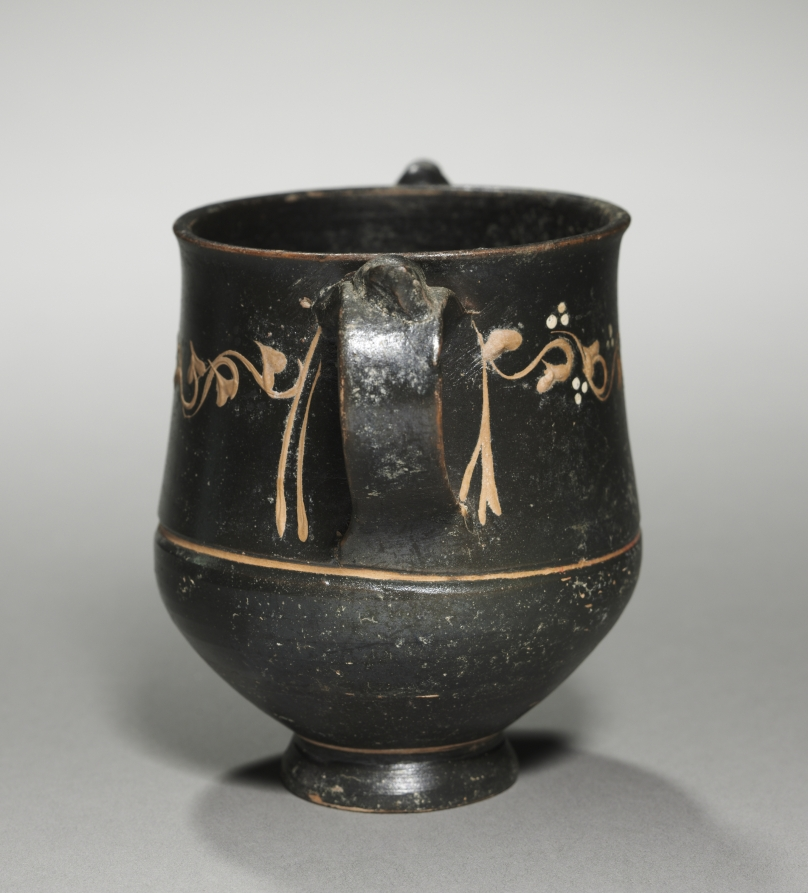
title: Black-Gloss Kantharos (Drinking Cup)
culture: Greek, Attic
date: c. 300–275 BCE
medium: ceramic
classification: Ceramic